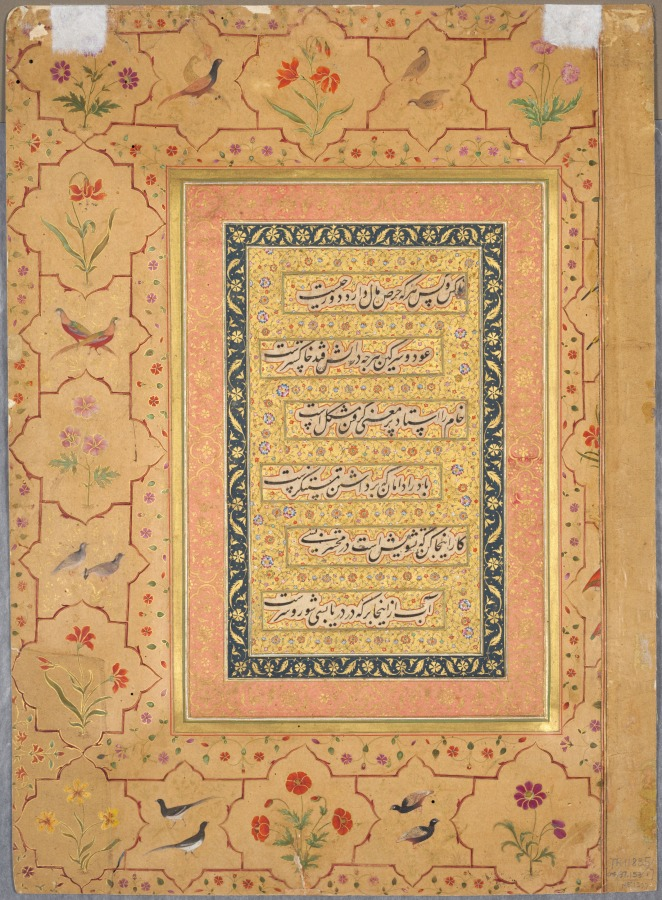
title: Calligraphy framed by an ornamental border with poppies and pairs of birds, from the Late Shah Jahan Album (verso)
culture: Mughal India, court of Shah Jahan (reigned 1628–58)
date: c. 1653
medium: Gum tempera, ink, and gold on paper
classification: Painting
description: Treated as a jewel set in gold and floral arabesques, this work is an example of how Mughal patrons held the art of calligraphy in higher esteem than figural painting. This work is unsigned, so the calligrapher remains unknown, but the lines are excerpts from a didactic ode composed by Amir Khusrau (1253–1325) of Delhi, known as the "Parrot of India," one of the most accomplished authors of the Persian language in India. The text itself reads: "Anyone, whether noble or ignoble, who covets wealth, is destined for hell. Aloe-wood and dung, once thrown in the fire, turn to ash. It is hard for an unrefined mind to master sophisticated thought. For the wind to lift up the feet of a mountain is impossible. See to your tasks here and now, for there is mayhem on the Day of Judgment. Draw your water from here, for there is much tumult and mischief out in the sea."